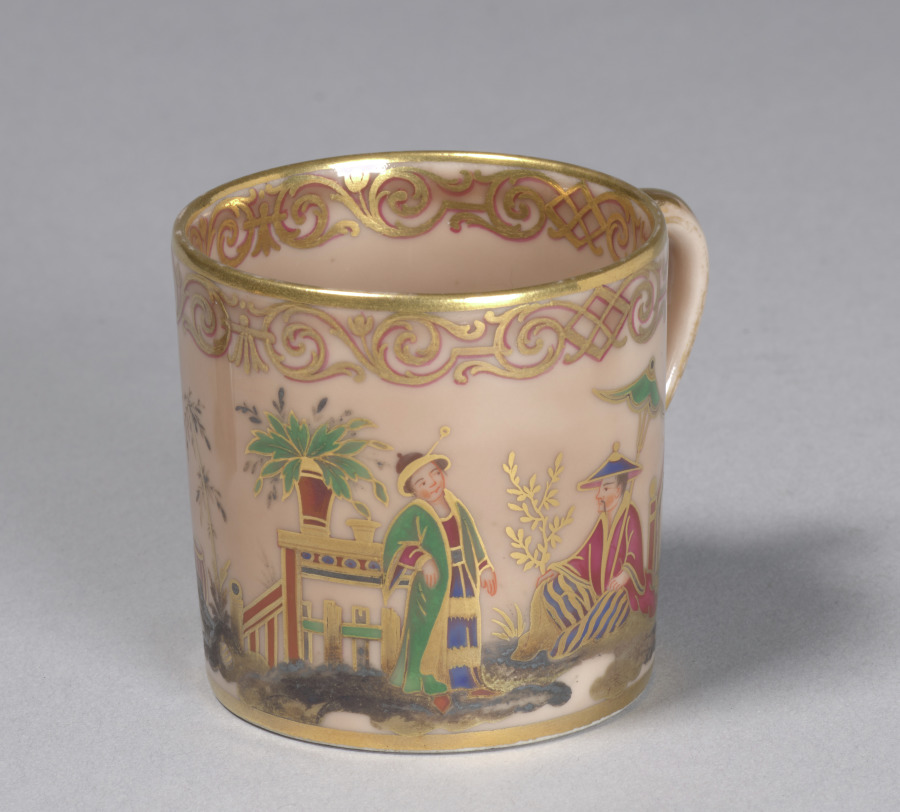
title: Cup (Gobelet litron)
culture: France, Sèvres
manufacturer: Sèvres Porcelain Factory (French, est. 1756)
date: 1778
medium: hard-paste porcelain with overglaze enamel decoration and gilt and silver decoration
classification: Ceramic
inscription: Interlaced Ls surmounted by a crown with date letters 'AA' enclosed; 'L.' below for Louis-François l'Ecot (in red)